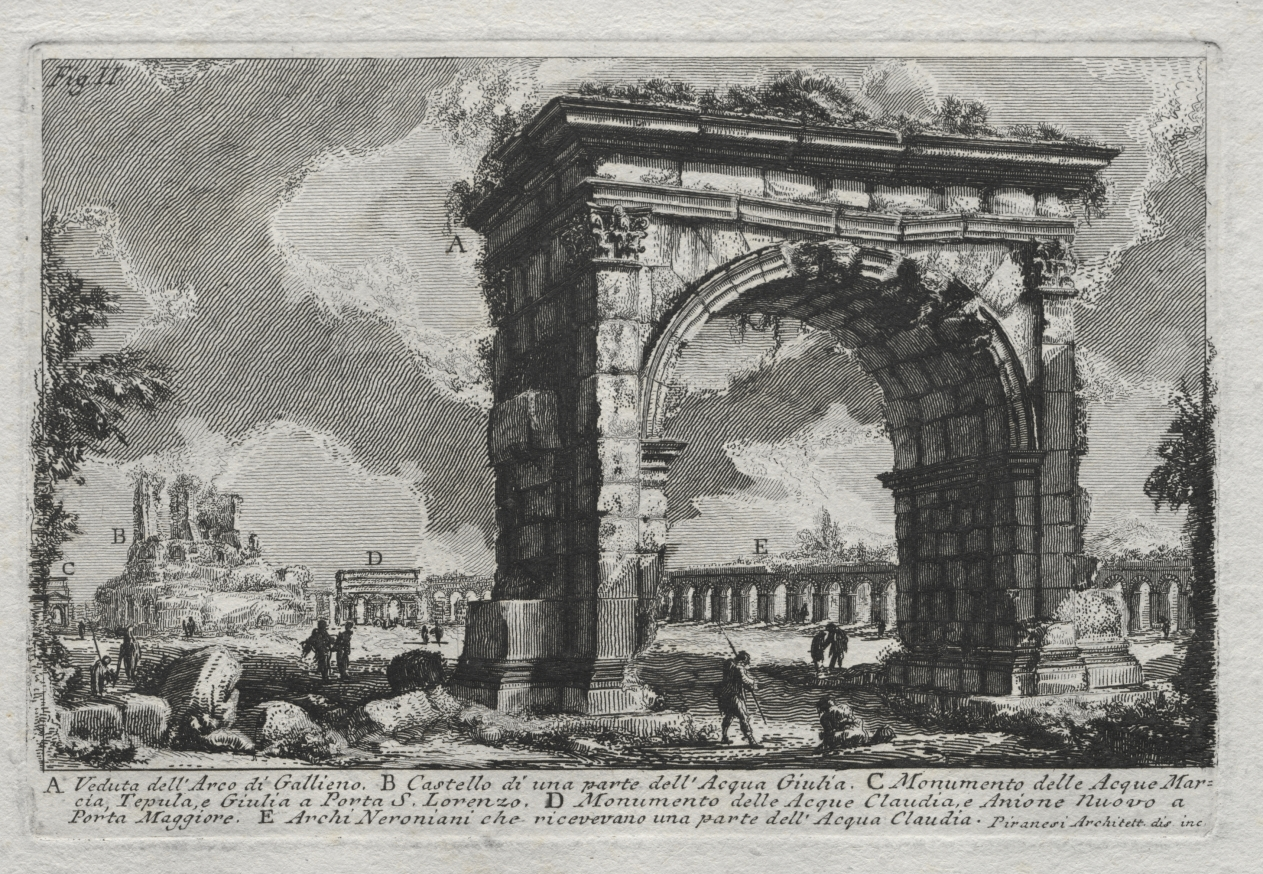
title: Veduta dell'Arco di Gallieno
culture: Italy, 18th century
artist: Giovanni Battista Piranesi (Italian, 1720–1778)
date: c. 1756–57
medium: etching and engraving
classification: Print